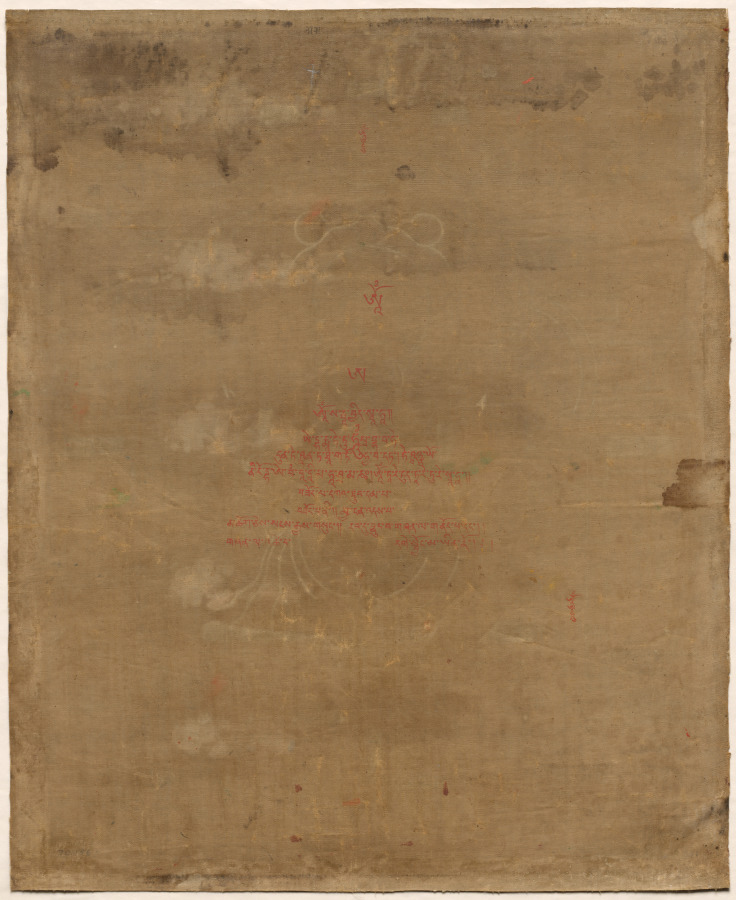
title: Green Tara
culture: Central Tibet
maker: attributed to Aniko (Nepalese, active in Tibet mid- to late 1200s)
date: c. 1260s; mounted, 2020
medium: thangka; gum tempera, ink, and gold on sized cotton; mount: silk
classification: Painting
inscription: Om Ah Hum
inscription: om tare tutare ture svaha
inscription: Om Ah Hum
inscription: Om Ah Hum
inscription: om ah sarva vyida svaha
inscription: ye dharmā hetuprabhavā he- tuṃ teṣāṃ tathāgato hy avadat teṣāṃ ca yo nirodha evaṃvādī mahāśramaṇaḥ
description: For Tibetans, Green Tara is one of the preeminent figures of their Buddhist faith, a radiant savioress who embodies the female form of the perfect, enlightened mind. The Green Tara in the Cleveland thangka—a Tibetan devotional painting on cloth—specifically dispels fear and provides protection, just like her mantra inscribed on the back side of the painting. Her green color and fear-not gesture link her to the cosmic Buddha of the North, enshrined above her head. Most scholars agree that this work was painted by the celebrated Nepalese artist known as Aniko.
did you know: The tiny monastic figure under Green Tara's right hand commissioned the painting.